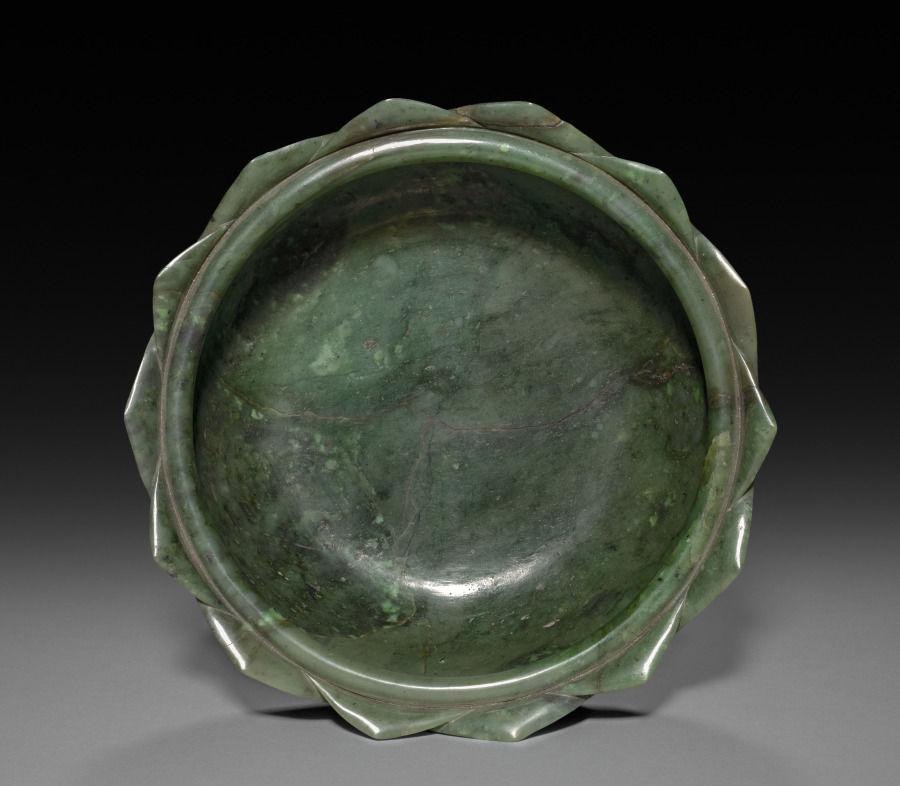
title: Offering Container in Form of Alms Bowl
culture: China, Qing dynasty (1644-1911)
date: 1700s or later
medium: jade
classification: Jade